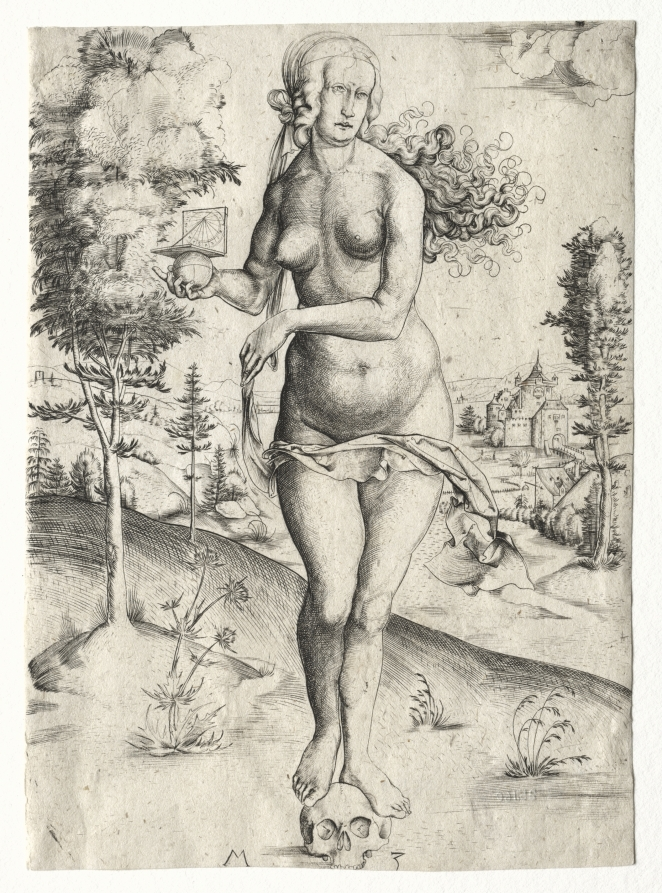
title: Memento Mori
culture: Germany, early 16th Century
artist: Master MZ (German)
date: 1500–03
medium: engraving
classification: Print